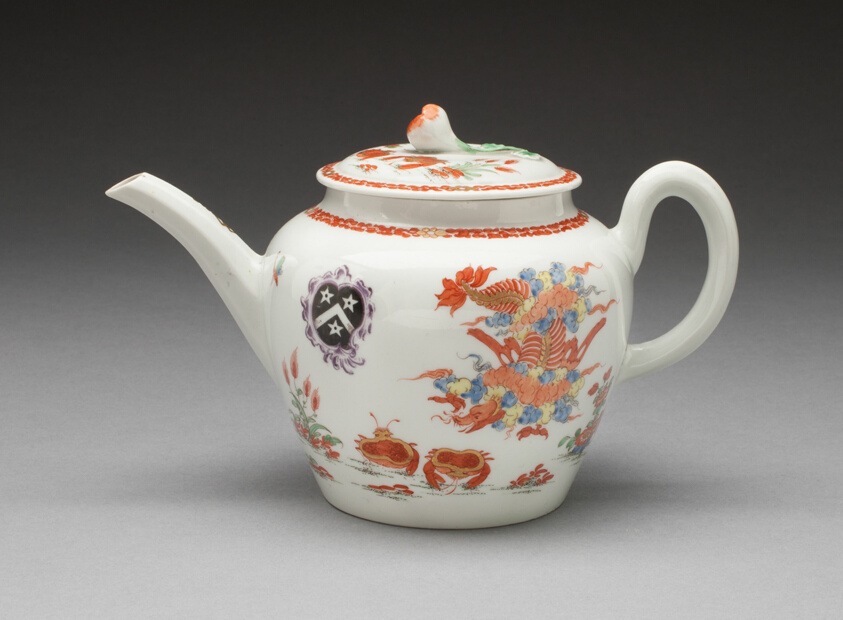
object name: Ceramics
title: Teapot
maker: Worcester Porcelain Factory (Warmstry House Period, 1751–1783); Worcester, England, founded 1751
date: c. 1760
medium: Soft-paste porcelain with polychrome enamels and gilding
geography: Worcester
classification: teapot; teaware; porcelain; european decorative arts; ceramics